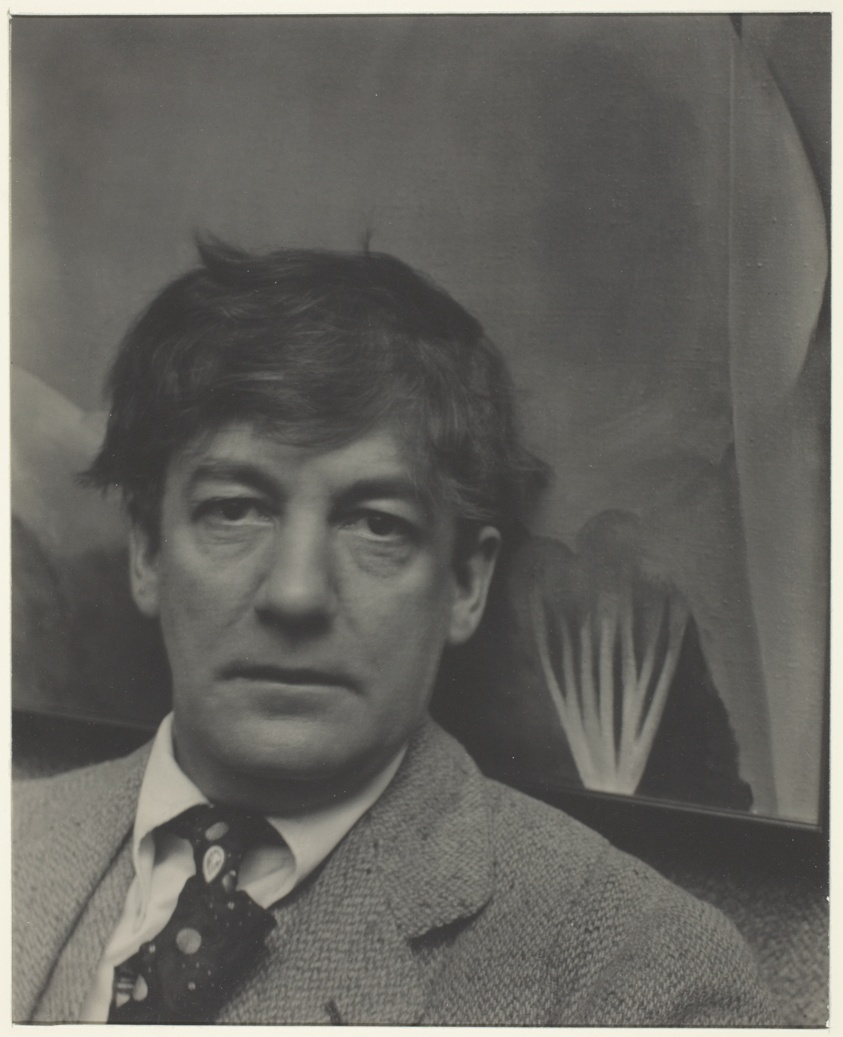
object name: Photograph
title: Sherwood Anderson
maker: Alfred Stieglitz (American, 1864–1946)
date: 1923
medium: Gelatin silver print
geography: United States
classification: gelatin silver (developing-out-paper) pr; photographic process; photography; photograph